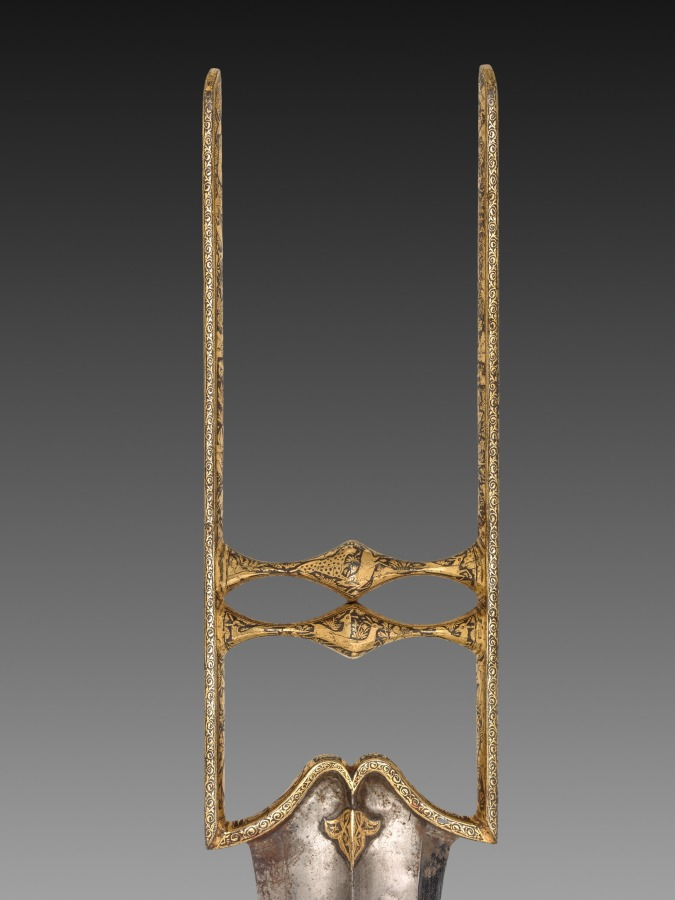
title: Katar (Stabbing Dagger)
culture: India, Mughal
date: 1700s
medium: Iron handle with gold inlay; steel blade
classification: Arms and Armor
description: Stabbing daggers called katar were distinctive to India and often worn by soldiers and courtiers, tucked into their belts. Covering the entire handle are tiny scenes of lions and cheetahs hunting deer and buffalo in rocky wooded settings.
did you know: The ornament on the handle faces up from the perspective of a right-handed user, on all sides.